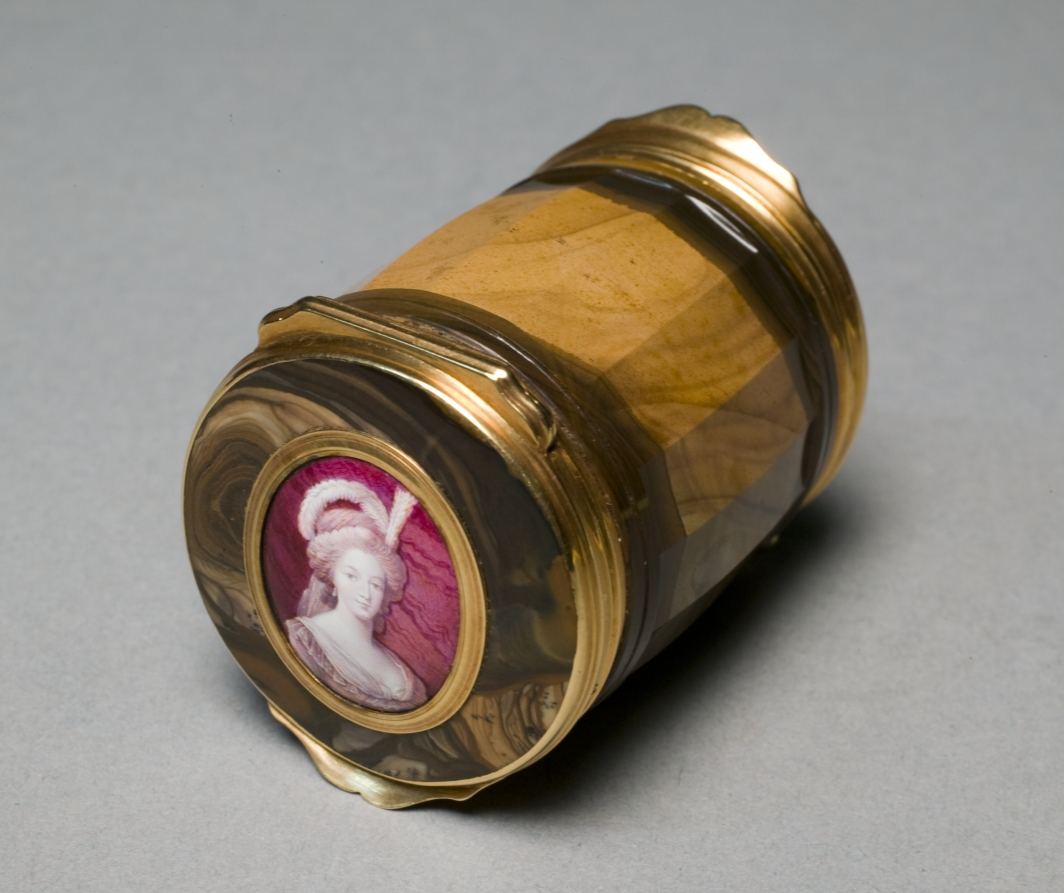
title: Double Snuff Box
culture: England, mid-18th century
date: c. 1775–80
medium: gold-mounted agate, enamel rose camaïeu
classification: Miscellaneous